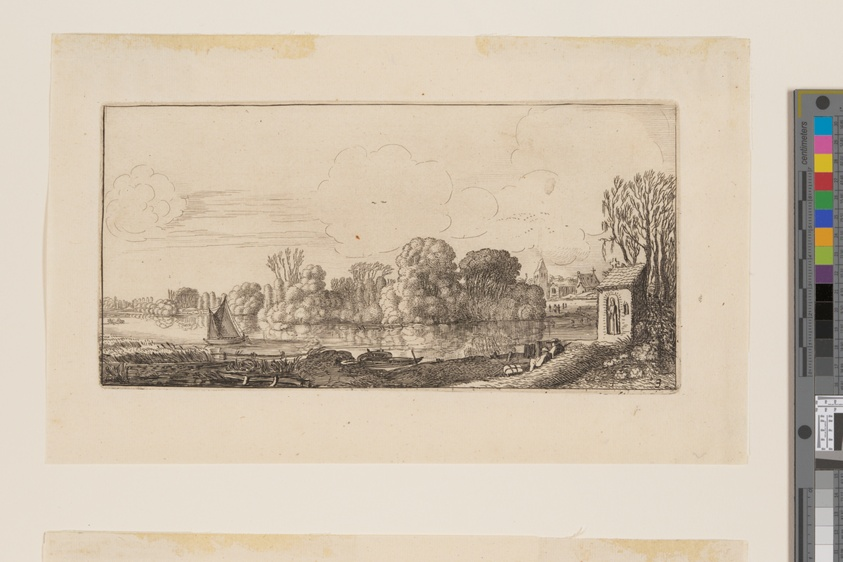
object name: Print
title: A Little Chapel by a Pond, from Six Landscapes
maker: Jan van de Velde II; Dutch, c. 1593–1641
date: c. 1613-1640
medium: Etching on ivory laid paper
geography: Netherlands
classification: etching; paper; print; prints and drawing